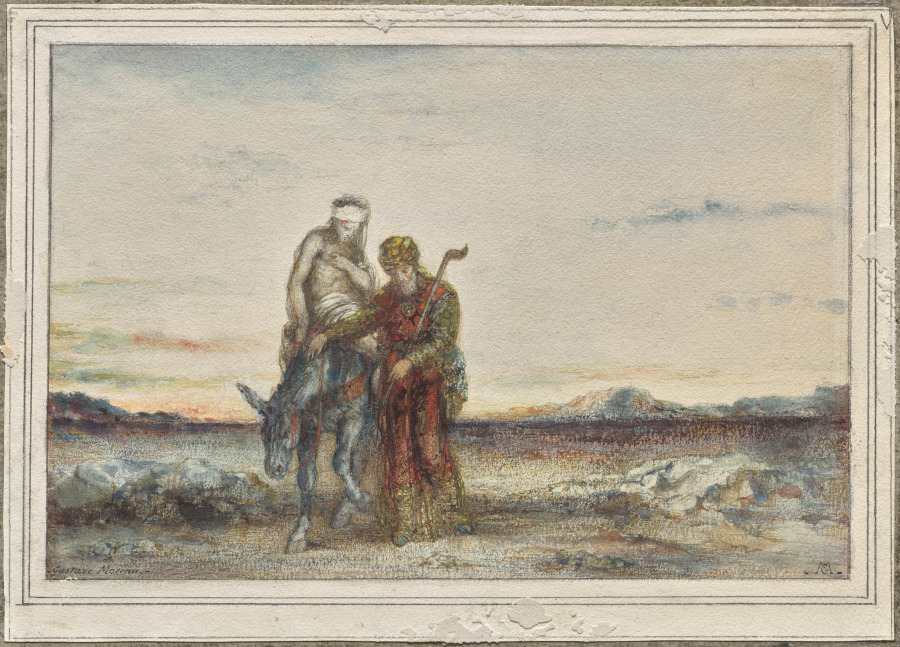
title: The Good Samaritan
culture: France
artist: Gustave Moreau (French, 1826–1898)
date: c. 1865–70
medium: watercolor, gouache, and graphite on paper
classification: Drawing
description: Gustave Moreau was distinctive within Symbolism—a movement focused on imagination and interiority—for the fact that he realized relatively traditional subjects often drawn from mythology and religion. Here, Moreau depicts a scene from the Good Samaritan, a story from the Bible’s New Testament about a wounded traveler who is helped by a passerby, despite the ideological and religious differences between the two. Moreau presents the narrative’s most poignant moment, showing the Samaritan giving up his own horse to help his fellow man. The artist used dense, jewellike layers of watercolor to give the scene an emotional and otherworldly tone.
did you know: Shortly after this watercolor was completed, Gustave Moreau sold it to one of his important patrons and supporters, the collector Edmond Taigny.